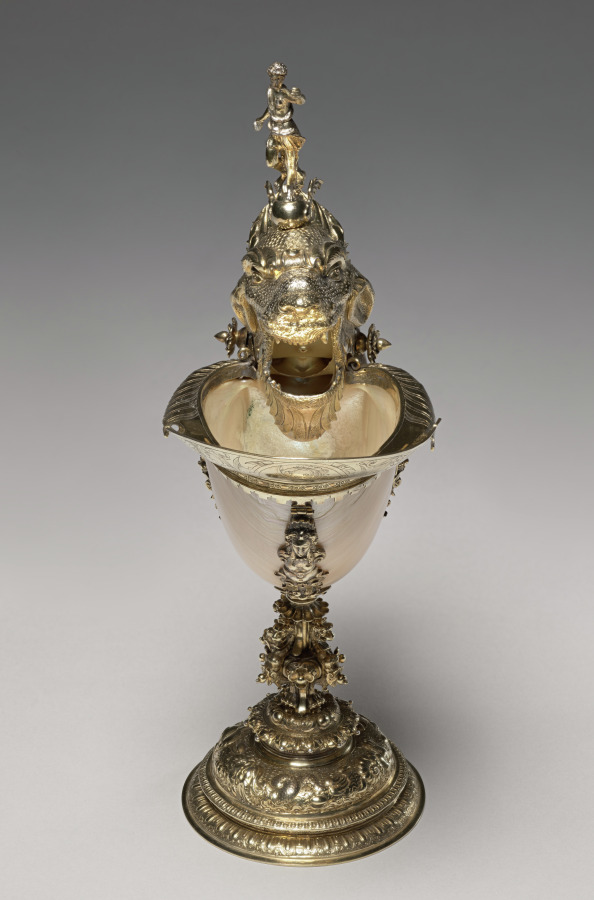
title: Nautilus Cup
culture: Netherlands, Holland, Delft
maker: Cornelis Jansz van der Burch (Dutch, active in Delft, d. 1615)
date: 1607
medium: Silver-gilt, nautilus shell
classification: Metalwork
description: Nautilus shells were brought to the Netherlands from Indonesia. Skilled Dutch silversmiths mounted them in silver, creating luxurious vessels that were sought after by wealthy collectors. Early Dutch nautilus cups are mainly associated with the city of Delft, although only a few other examples made in Delft are known from the late sixteenth and early seventeenth centuries. They feature the dramatic motif of a sea monster’s head.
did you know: The nautilus is a marine mollusk that swims by expelling water from its shell using jet propulsion.